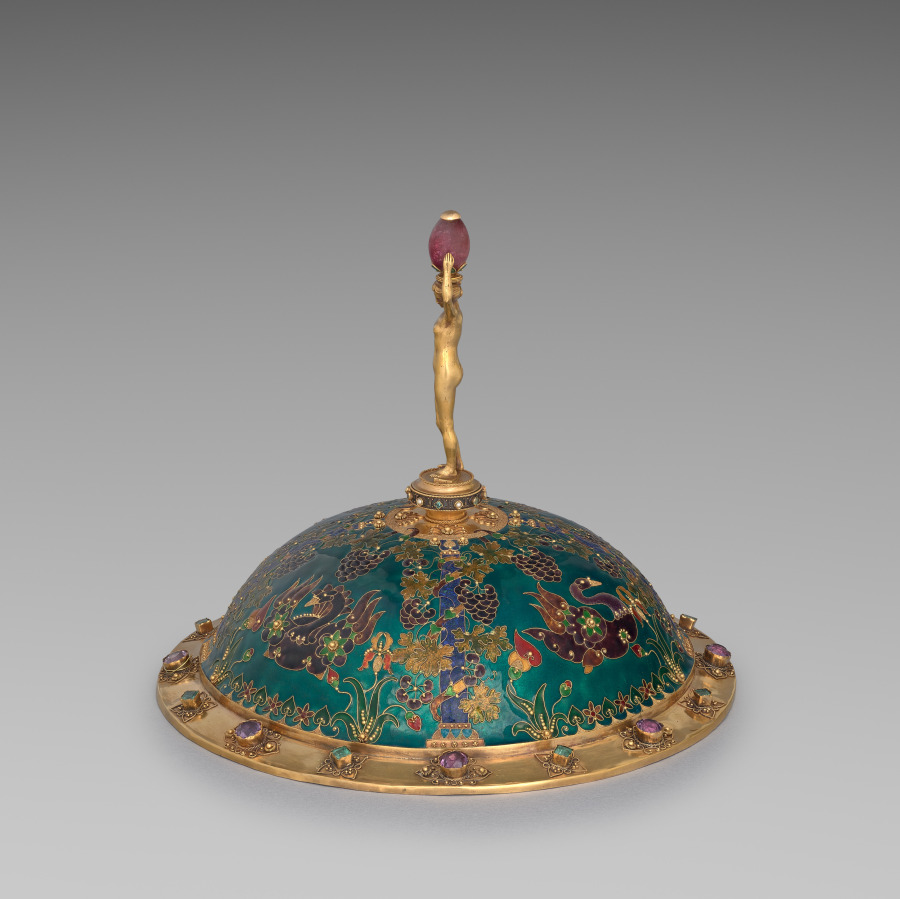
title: Cover for a Cup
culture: France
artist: Armand Point (French, 1861–1932)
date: c. 1897–99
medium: amethyst, silver-gilt, cloisonné enamel, aquamarine, rubies, malachite, lapis lazuli, pearls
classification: Metalwork